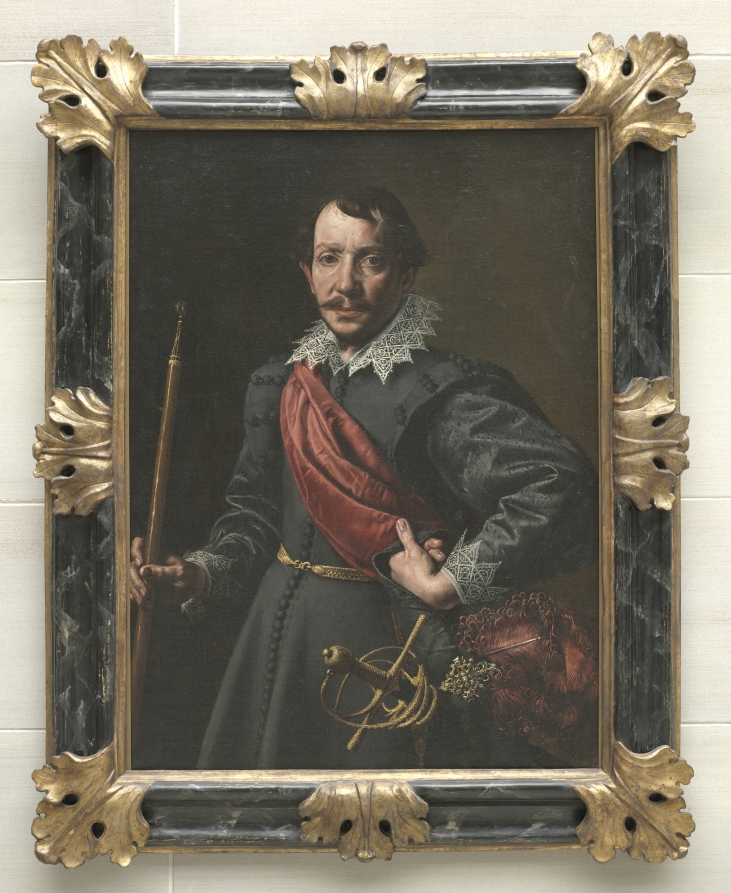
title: Portrait of a Man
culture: Italy, 17th century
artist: Tanzio da Varallo (Italian, c. 1575/80–1635)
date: c. 1620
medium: oil on canvas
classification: Painting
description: This portrait of an unknown man includes a detailed representation of a rapier, a sword worn with civilian dress and used in duels. On the basis of style, the rapier in this painting belonged to a distinctive group of sword hilts decorated between about 1570 and 1600. It was probably made in northern Italy.The son of a Piedmontese architect, Tanzio spent most of his life in northern Italy, but worked briefly in Rome and southern Italy, mainly Naples. These trips brought him under the influence of Caravaggio, whose dramatic realism Tanzio integrated into his own elegant, decorative style.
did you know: Dashing accessories enliven this portrait, including a rapier with an elegantly spiraling guard, produced exclusively in North Italy between 1570 and 1600.